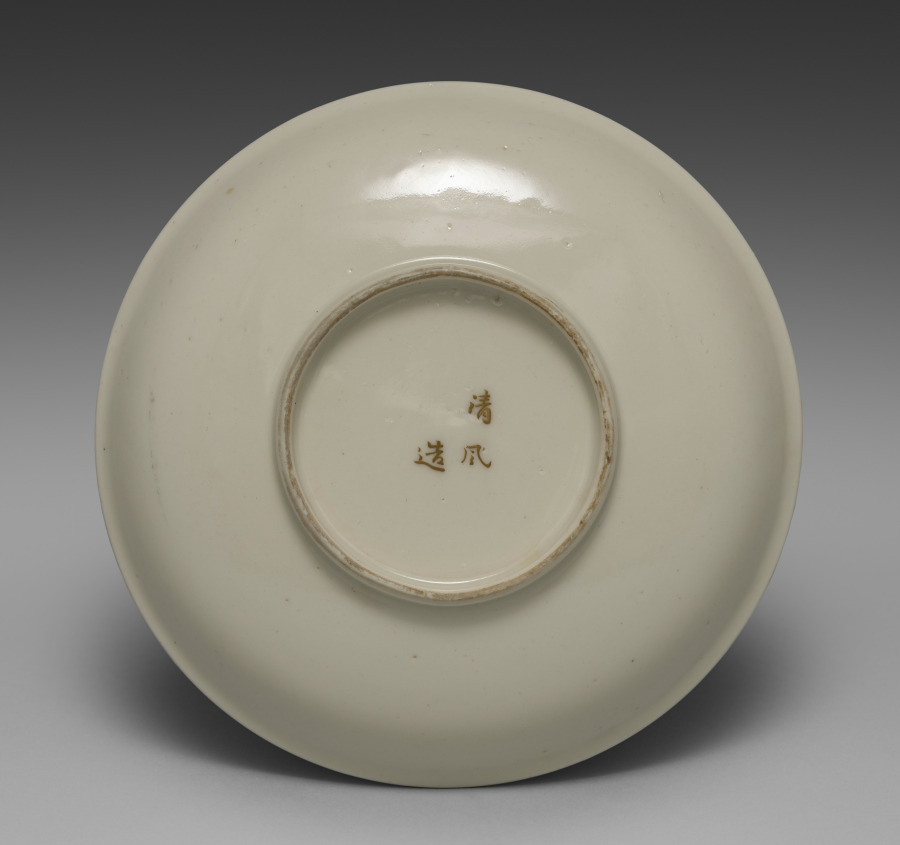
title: Medium-sized Dish from Dining Set with Plum Blossoms and Cracked-Ice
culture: Japan, Meiji period (1868–1912)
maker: Seifū Yohei II (Japanese, 1844–1878)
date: c. 1875–78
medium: Porcelain with molded designs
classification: Ceramic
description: Each item in this set has a delicate low-relief design of flowering plum branches over scattered, intersecting lines meant to resemble the cracked-ice surface of a frozen body of water and is signed on the base in gold pigment. While Yohei II produced many fine works in underglaze blue, like those produced by Kiyomizu Shichibei, he also made works in quite different styles later in his career, from the early 1870 s. In 1873, he was appointed purveyor to the Industrial Center of Kyoto Prefecture, a designation associated with Kyoto’s efforts to reach an international market through the port of Kobe; and from 1875 until his death, he was involved in national-level projects to present Japanese ceramics across the world. It was during this period that Yohei III was apprenticed to Yohei II, and it has been suggested that this set may in fact be an early example of Yohei III’s work, which he signed with his teacher’s name. Decorated with flowers resembling Japanese textile motifs, the set calls to mind the design of Yohei II’s pair of vases with plum blossoms in the Victoria and Albert Museum. Here, the elaborate trees created for a formal public exhibition setting have been translated into the approachable blossoms of the genteel domestic environment. While the designs are consistent across the pieces, each raised flower petal and pistil and each incised line in the ice was done by hand, so the cups, bowls, and dishes are similar yet unique. The bottoms of two boxes once identified the set’s owner, but the information has been deliberately obscured with black ink. However, inscriptions still visible appear to indicate two occasions, once at the end of July 1886 , and once again in June 1916 , when parts of the set were requested from Hokura in Niigata Prefecture. The location corresponds to a neighborhood in the present-day city of Jōetsu. The surname Tsuji 辻 also appears on a paper tag affixed to one of the box cloths. Future research may possibly reveal more about their provenance. A vase by Yohei III in a private collection combines the formal grandeur of the Yohei II vases in the Victoria and Albert Museum with the gentler design of this dining set, placing flowering plum trees against soft, scalloped-edge clouds resembling those in golden screens.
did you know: The dining wares have a creamy white coloration that the four boxes containing them identify as Korean in style.